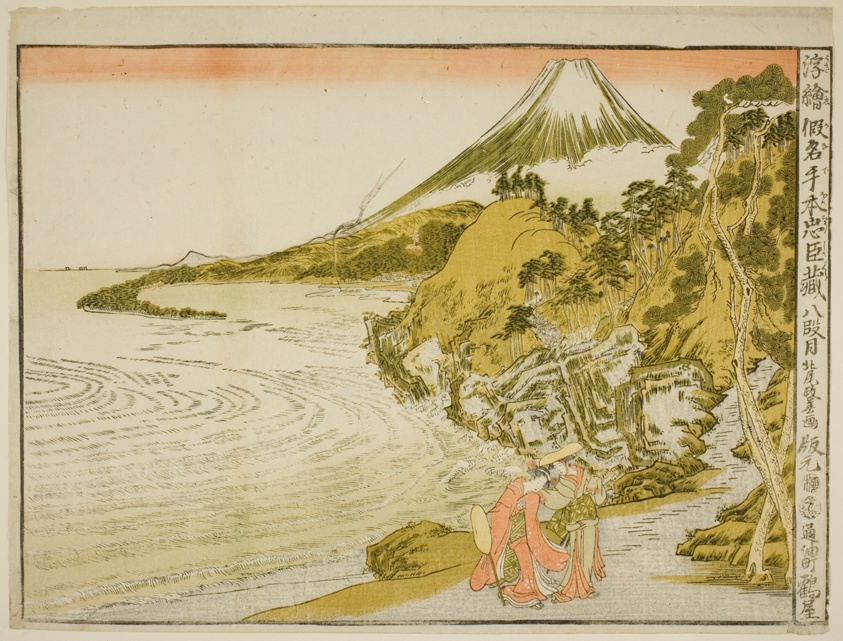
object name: Print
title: Act VIII (Hachidanme), from the series "Perspective Pictures of the Storehouse of Loyal Retainers (Uki-e kanadehon Chushingura)"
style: Japanese (culture or style), edo (japanese period)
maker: Kitao Masayoshi (Kuwagata Keisai) (Japanese, 1764–1824)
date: c. 1791/94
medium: Color woodblock print; horizontal o-oban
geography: Japan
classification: woodblock; print